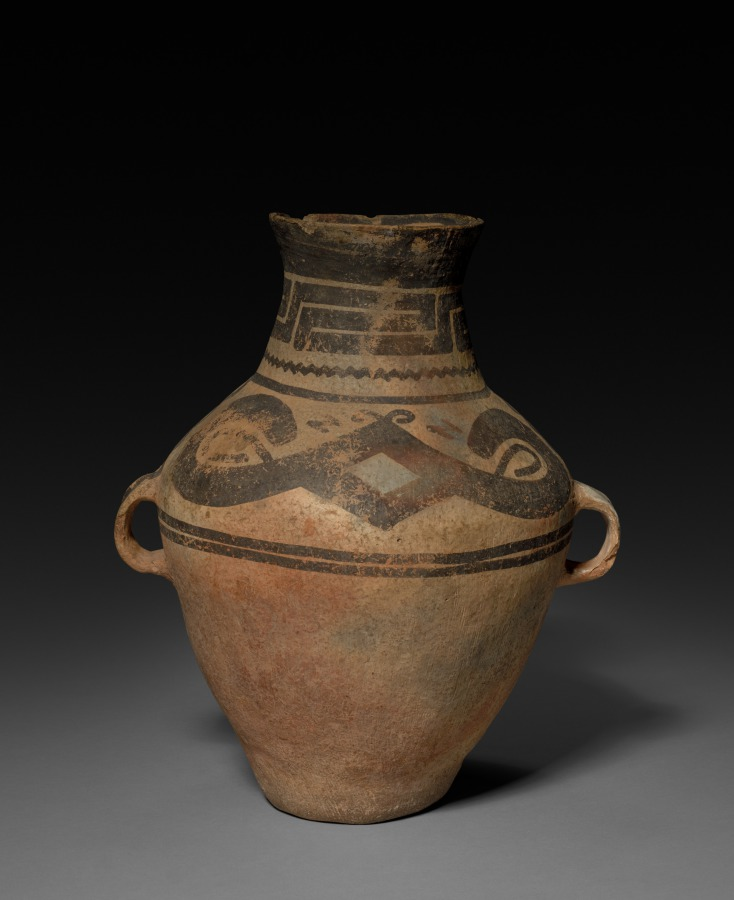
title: Urn with Lug Handles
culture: China, Gansu province, Xindian Culture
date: c. 1300–1000 BCE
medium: earthenware with slip coating and painted decoration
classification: Ceramic